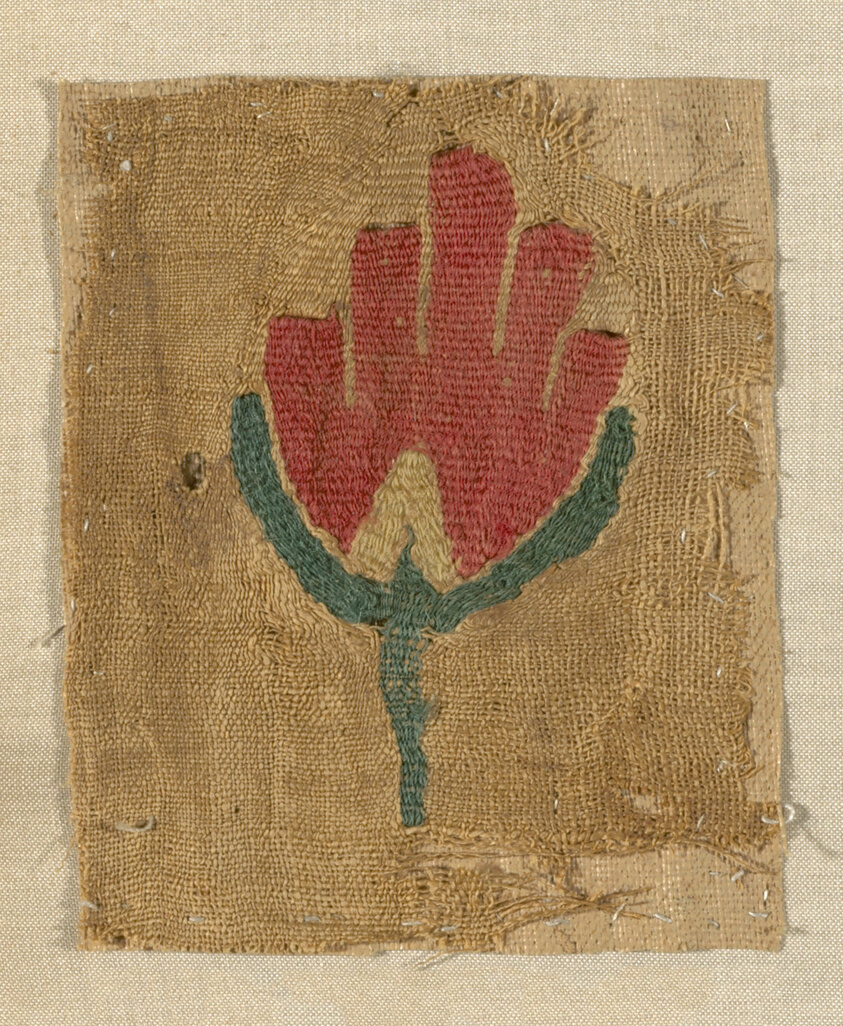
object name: Textile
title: Fragment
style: roman period (egyptian)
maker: Egypt, Akhmin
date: Roman period (30 B.C.– 641 A.D.), 5th/6th century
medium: Linen and wool, slit tapestry weave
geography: Egypt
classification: textile; weaving